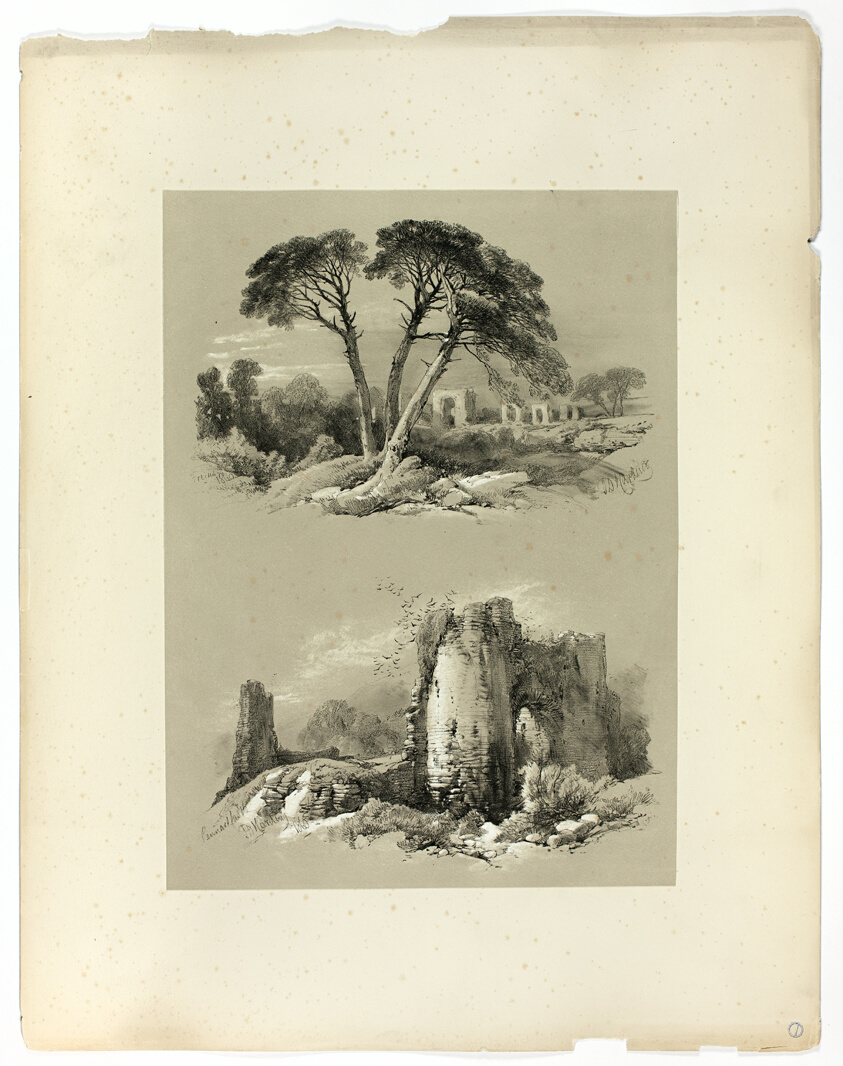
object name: Print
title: Frejus and Pennard Castle, from Picturesque Selections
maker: James Duffield Harding, (English, 1798-1863); Published by W. Kent and Co.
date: 1860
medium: Lithograph on paper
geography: England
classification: lithograph; print; prints and drawing